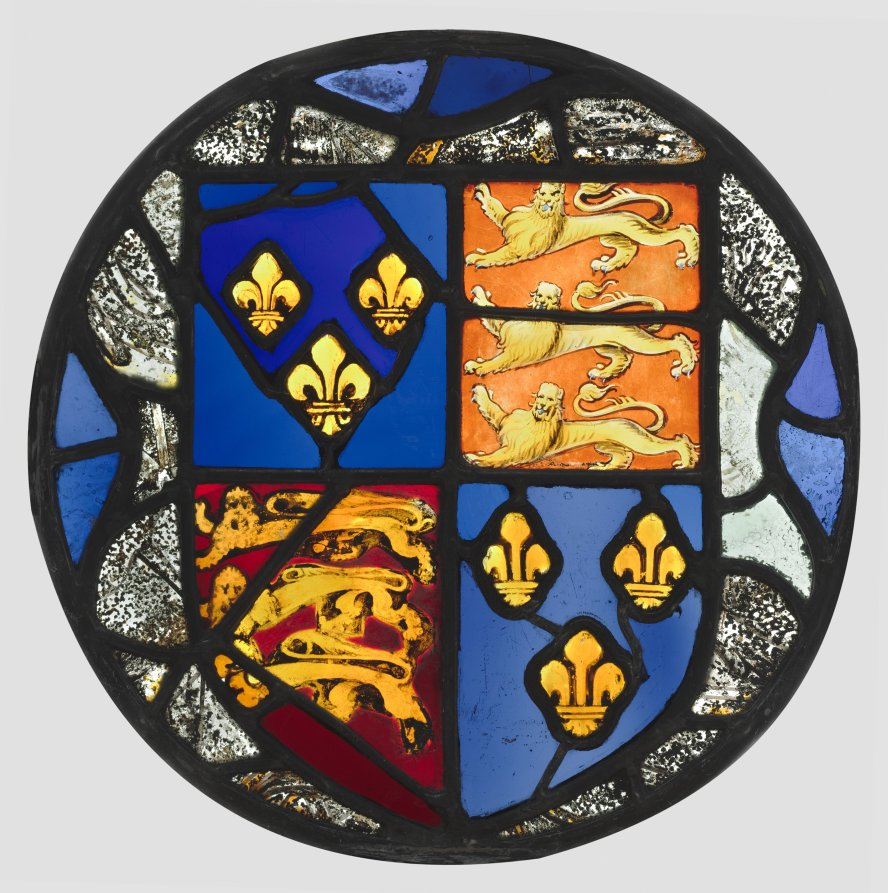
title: Heraldic Roundel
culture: England, 16th century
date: 1500s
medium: pot-metal and white glass, silver stain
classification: Glass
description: Upper (composite panel): Lions Rampant, guild emblems: Arms of the Isle of Man Lower: Arms of England (1406-1603) quartered with France (fleur-de-lis)